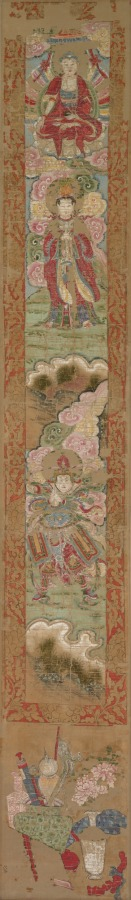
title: Buddhist Panel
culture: China or Korea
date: 1600s–1700s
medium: Hanging scroll; ink and color on paper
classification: Painting